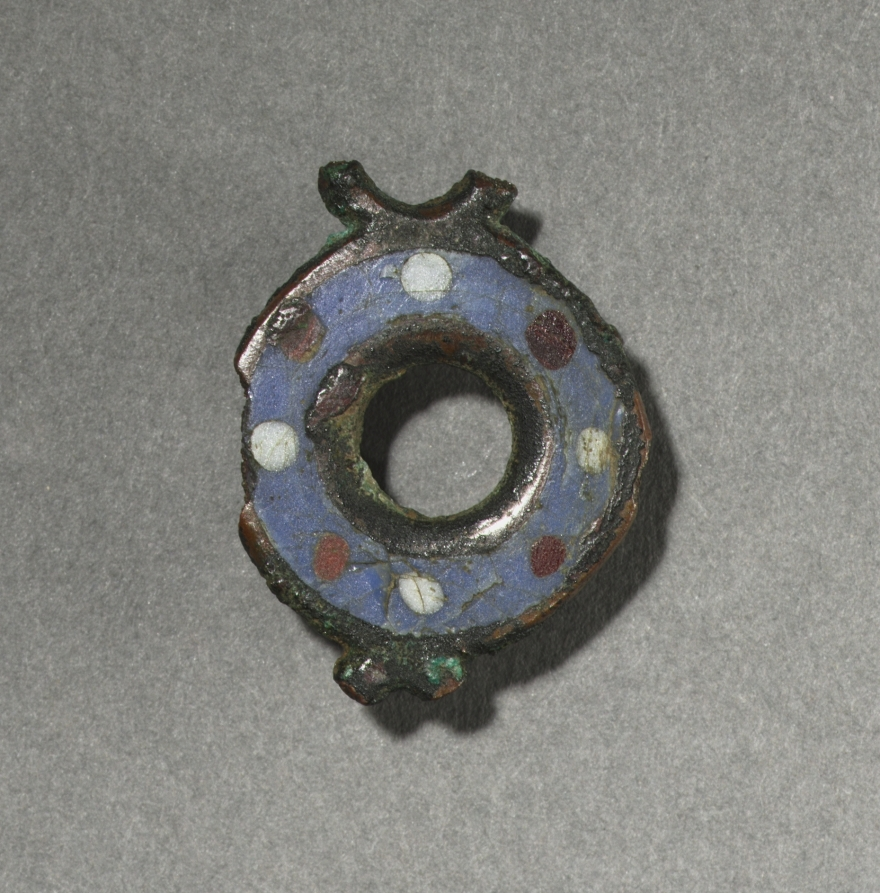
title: Ornamental Brooch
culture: Gallo-Roman or Romano-British, Migration period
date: c. 100–300 CE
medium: bronze and champlevé enamel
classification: Jewelry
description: These brooches functioned as garment clasps (much like the generally larger fibulae) and are distinctive for their decorative enamels. The art of enameling was highly popular among the conquered peoples who lived on the outskirts of the Roman empire, chiefly the Celts and the Gauls. Though the enameling technique was practiced by the Romans themselves on small objects, the brightly colored decoration readily appealed to "barbarian" taste. By the AD 200s, enameled brooches like these were being made in abundance by the native peoples of Britain and Gaul (modern France and Belgium).